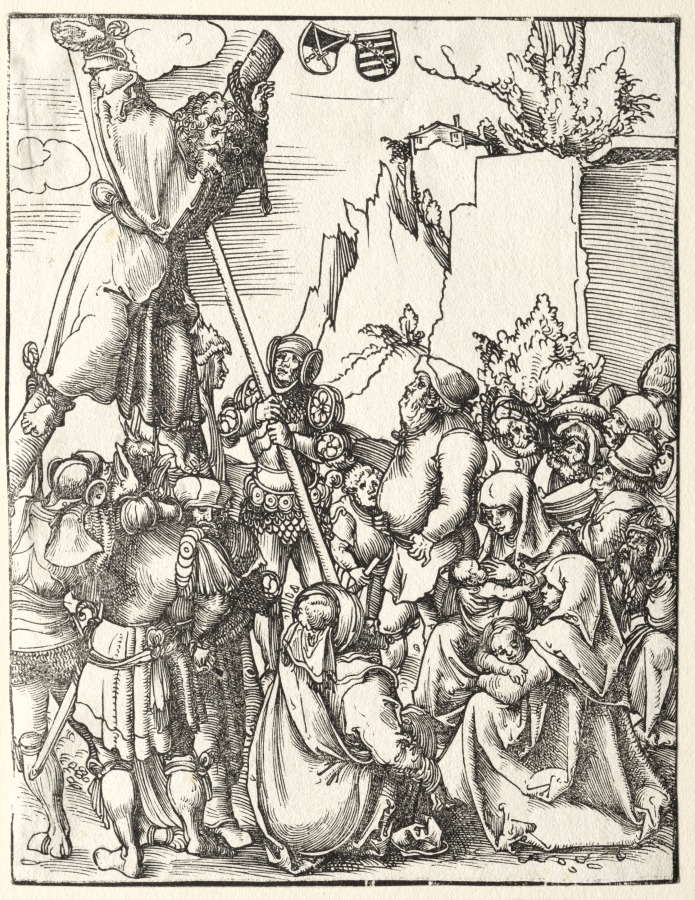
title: Martyrdom Series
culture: Germany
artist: Lucas Cranach (German, 1472–1553)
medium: woodcut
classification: Print